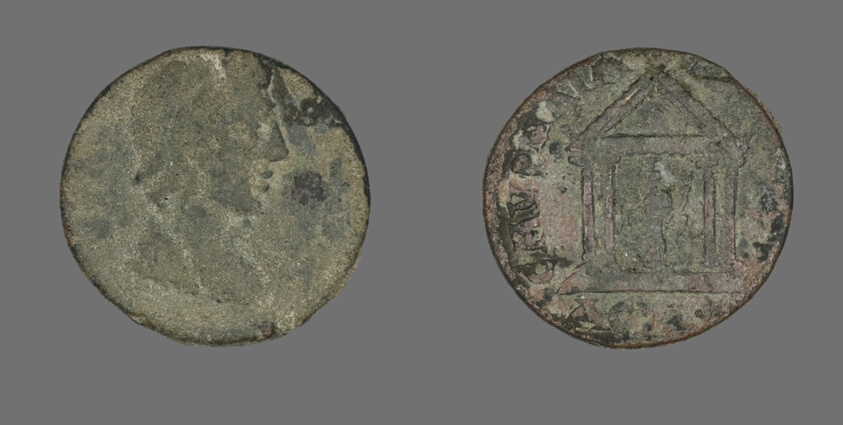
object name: Coin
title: Coin Depicting Senate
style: roman (ancient, style or period)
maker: Roman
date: 3rd century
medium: Bronze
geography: Roman Empire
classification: coin; ancient art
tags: gods (deities)